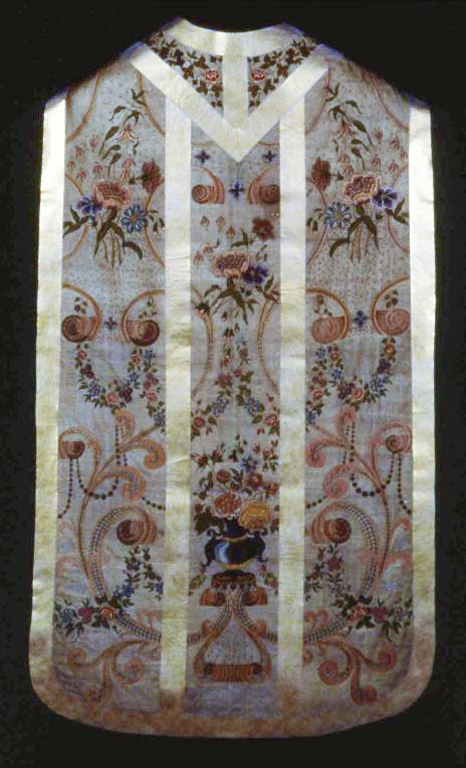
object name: Textile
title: Chasuble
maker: France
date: 1725/75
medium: Silk, plain weave; embroidered with silk and gilt-metal-strip-wrapped silk in chain, satin, single satin, single back, and split stitches; French knots; edged with gold leaf paper; lined with silk, plain weave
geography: France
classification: textile; needlework (visual works); liturgical